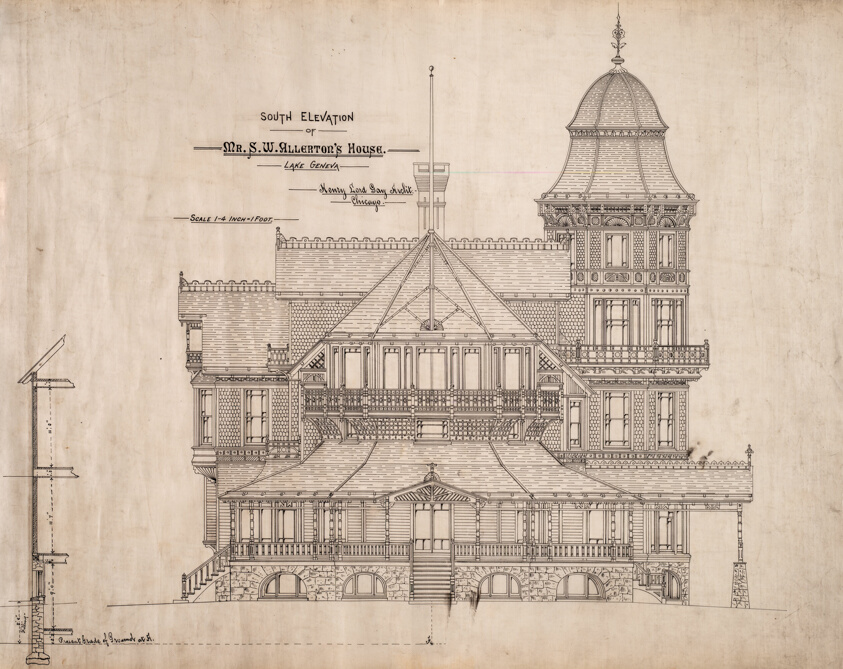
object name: Architectural Drawing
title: House for Mr. S.W. Allerton, Lake Geneva, Wisconsin: South Elevation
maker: Henry Lord Gay (American, 1844-1921)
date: c. 1884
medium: Ink on linen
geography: United States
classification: ink; architectural drawing